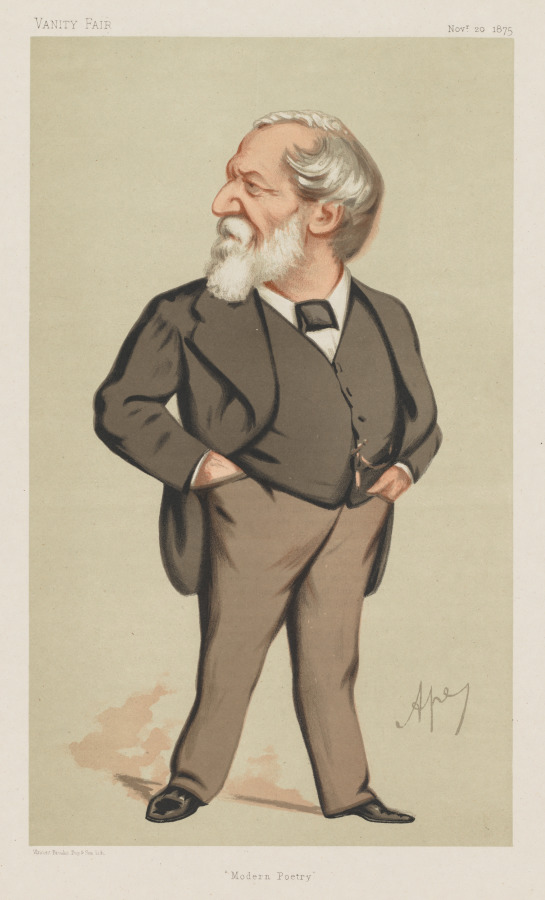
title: Vanity Fair: "Modern Poetry"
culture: Italy, 19th century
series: published in Vanity Fair Nov. 20, 1875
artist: Carlo (Ape) Pellegrini (Italian, 1839–1889)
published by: Vincent Brooks Day & Son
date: 1875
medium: color lithograph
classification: Print